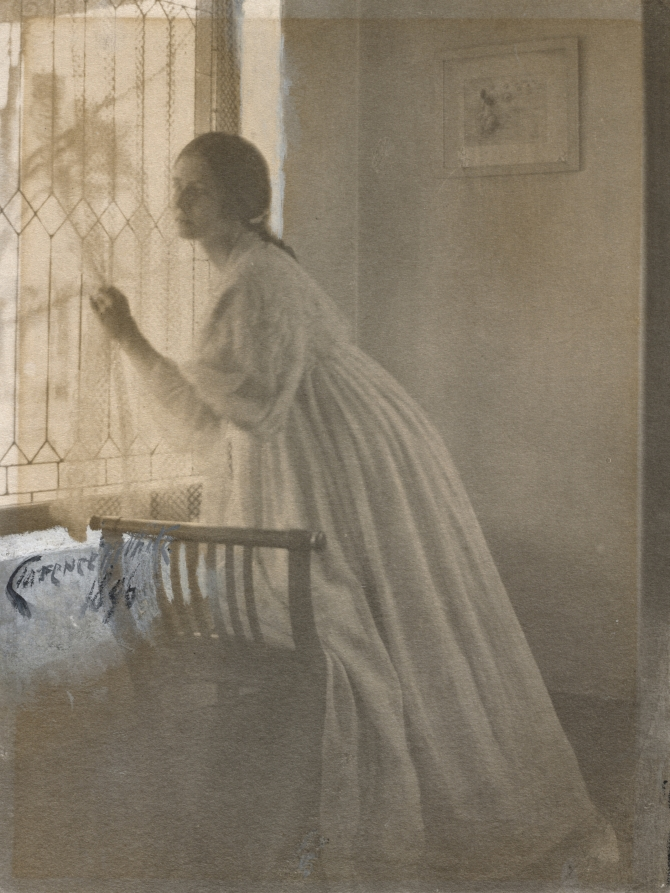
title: At the Window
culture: America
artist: Clarence H. White (American, 1871–1925)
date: 1896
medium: platinum print with watercolor and gouache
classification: Photograph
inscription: Painted on recto of photo: "Clarence H. White [signed] 1896"; written in pencil on verso: "Taken 1897 / Portrait of Julia McCune / by Clarence White"